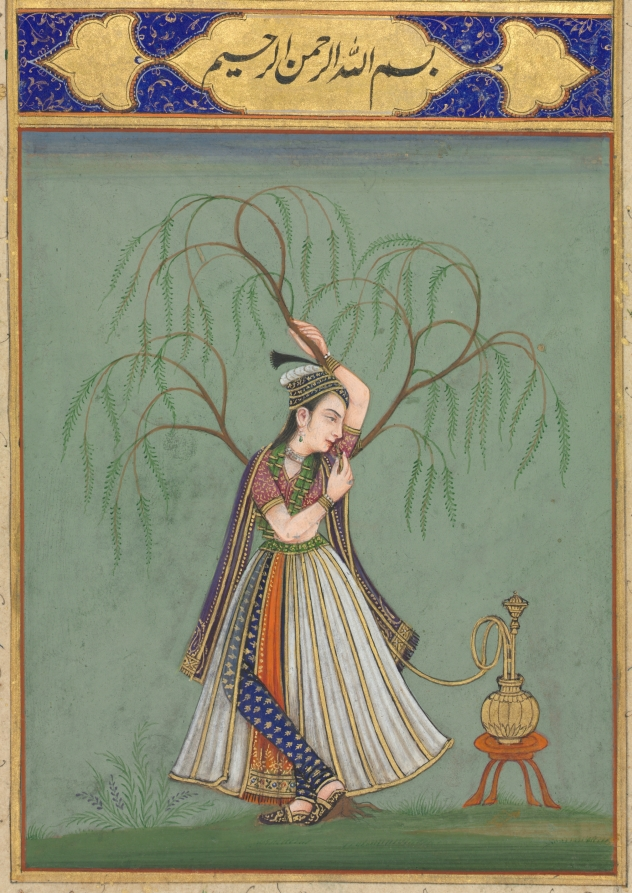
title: Princess Smoking a Hookah (as Salabhanjika)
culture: India, Mughal, Kulu influence, 18th century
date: 1700s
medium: Gum tempera and gold on paper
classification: Painting